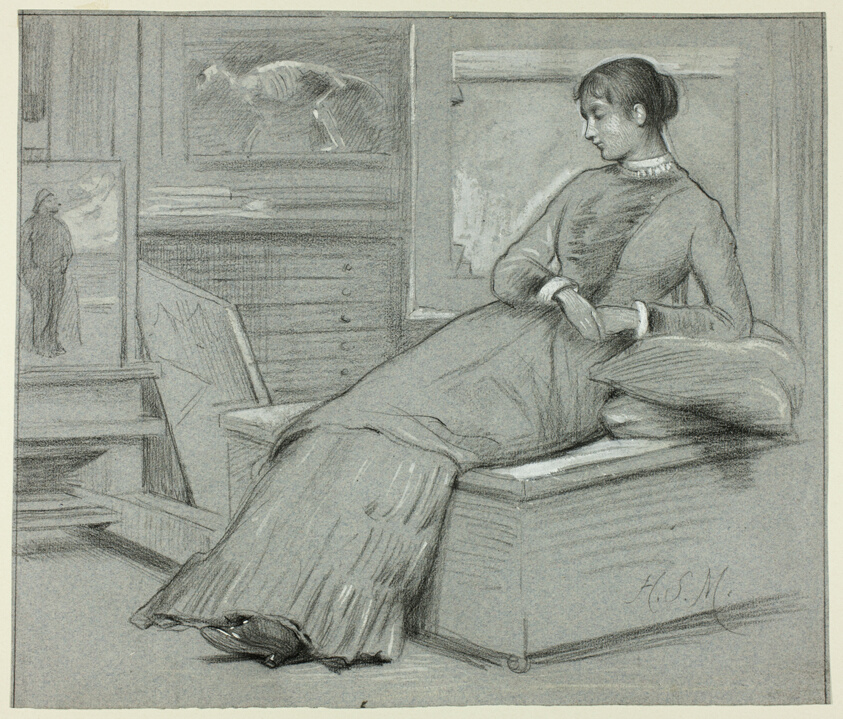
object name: Drawing and Watercolor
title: Woman Resting on a Platform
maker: Henry Stacy Marks (English, 1829-1898)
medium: Black pastel, heightened with white gouache, on blue laid paper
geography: England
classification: pastel; drawings (visual works); prints and drawing